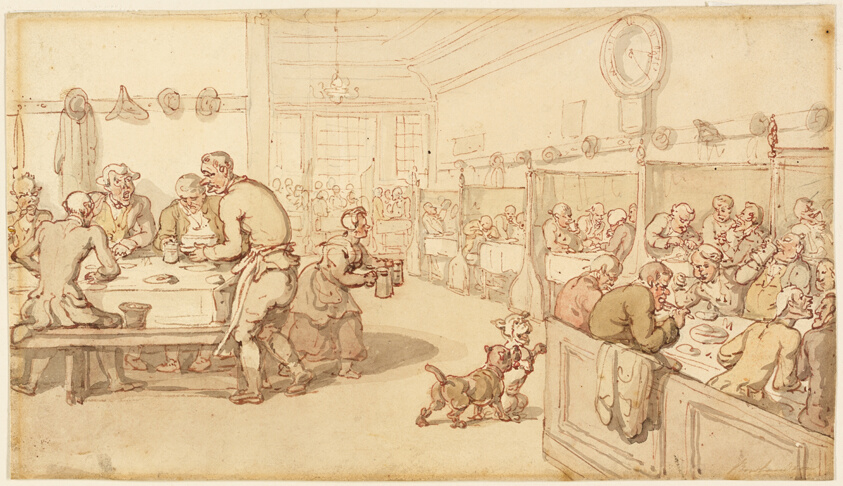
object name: Drawing and Watercolor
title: At an Old English Eating House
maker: Thomas Rowlandson (English, 1756-1827)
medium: Pen and red ink with brush and watercolor over graphite, on cream wove paper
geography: England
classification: watercolor; drawings (visual works); prints and drawing